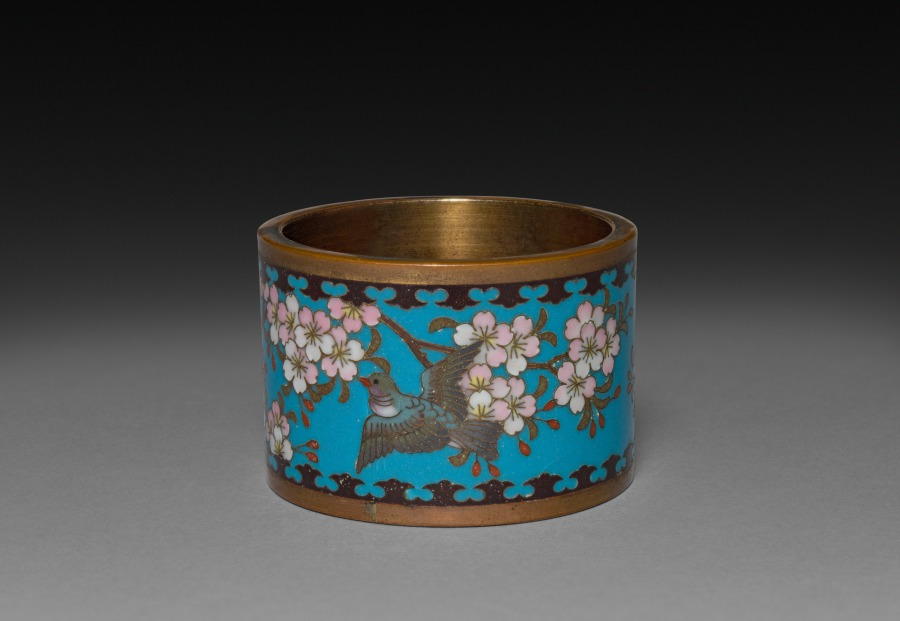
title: Napkin Ring with Cherry and Birds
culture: Japan, Meiji period (1868–1912) or Taishō period (1912–26)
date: early 1900s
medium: cloisonne enamel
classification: Enamel